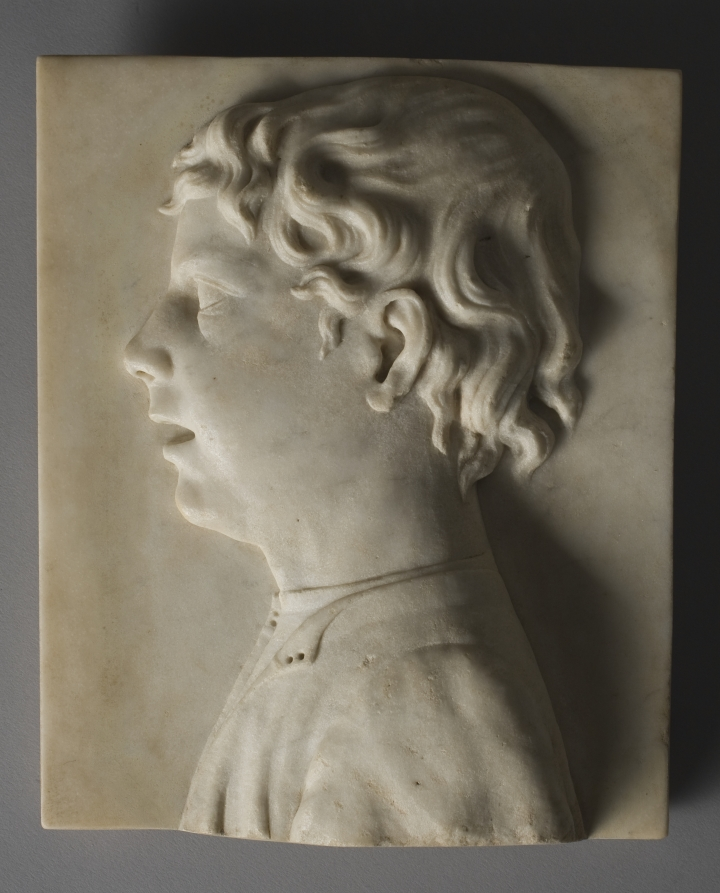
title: Head of a Boy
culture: Italy, Florence, 15th century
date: c. 1460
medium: marble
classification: Sculpture